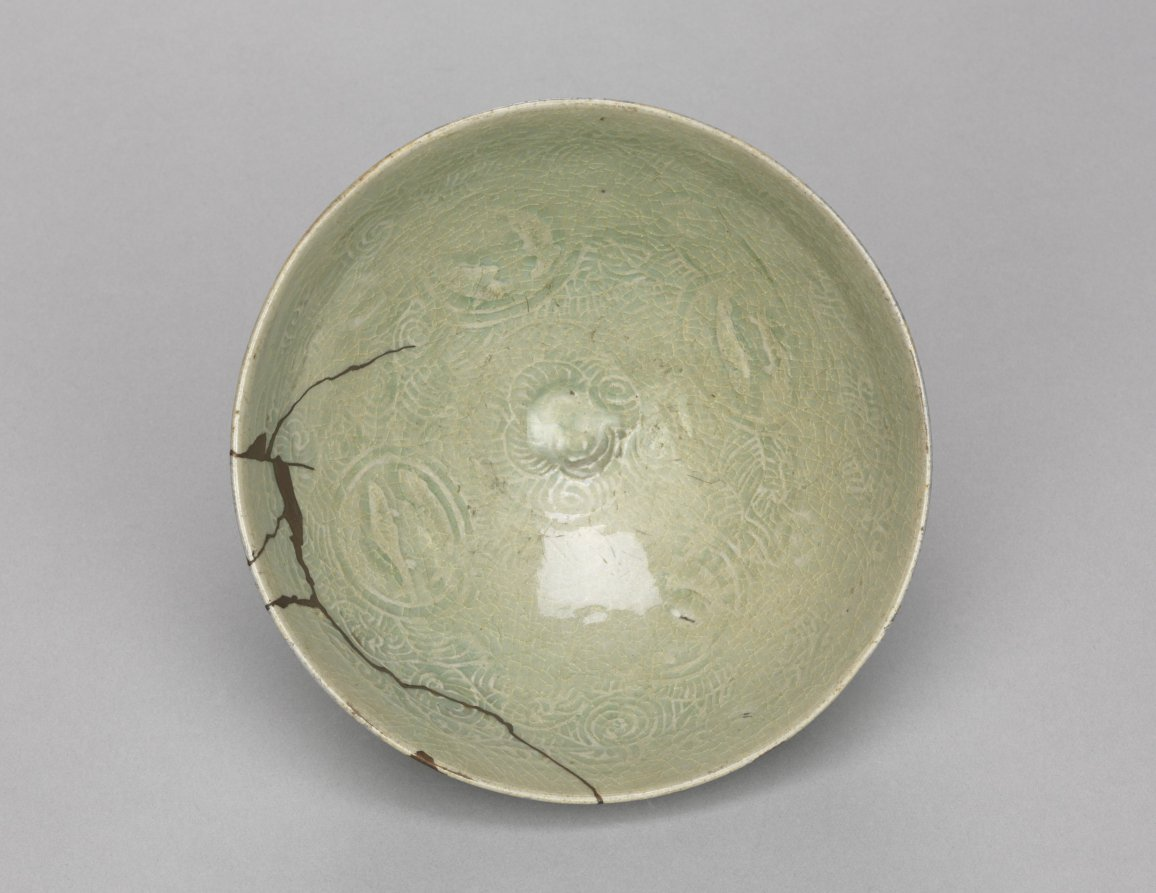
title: Bowl with Fish and Waves in Relief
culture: Korea, Goryeo dynasty (918–1392)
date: 1200s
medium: pottery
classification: Ceramic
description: As early as the 800s, the practice of drinking tea and wine became an important part of elite leisure culture in Korea. A wide bowl like this example was especially suitable for drinking powdered tea shaved from a compressed tea cake, the most commonly enjoyed type during the Goryeo period. While the inlaid image of bloomed chrysanthemums decorate the outer wall, that of fish swimming in waves in relief appear on the inner wall of this tea bowl. Such elaborate design tells us that tea wares then were aesthetically invested objects of luxury.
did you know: Kangjin and Buan kilns in Jeolla province were the two major production centers for celadon wares during the Goryeo period (918–1392).